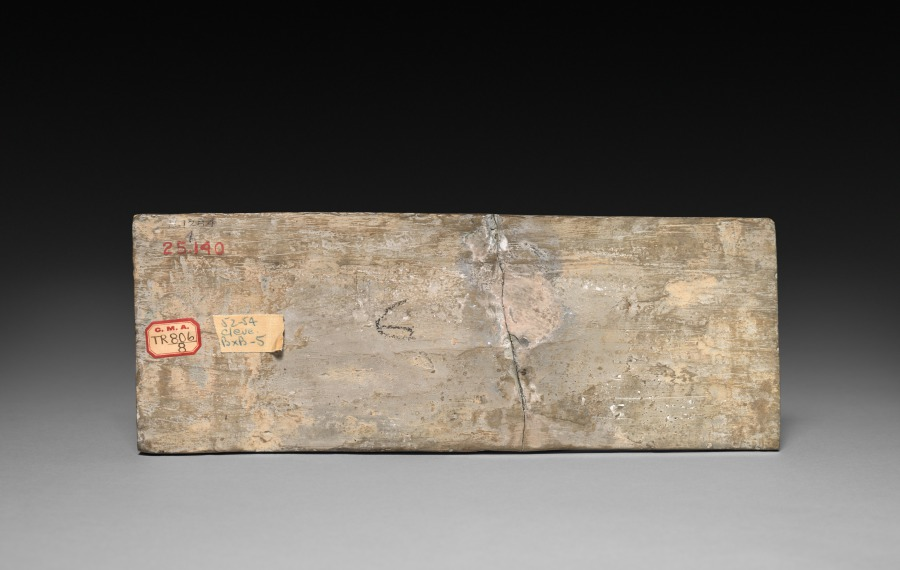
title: Relief with Tiger from a Funerary Stove Model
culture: China, from a tomb in Xi'an, Shaanxi province, Han dynasty (202 BCE–220 CE)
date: 202 BCE–220 CE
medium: earthenware with relief decoration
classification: Ceramic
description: This pottery panel and 1925.137 were made in molds to be joined with other panels to build a miniature stove. The panels, however, are not complete and presumably do not belong together. This panel depicts a tiger protecting the west.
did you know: Han dynasty tombs were often furnished with grave goods to provide the deceased with items for the afterlife.